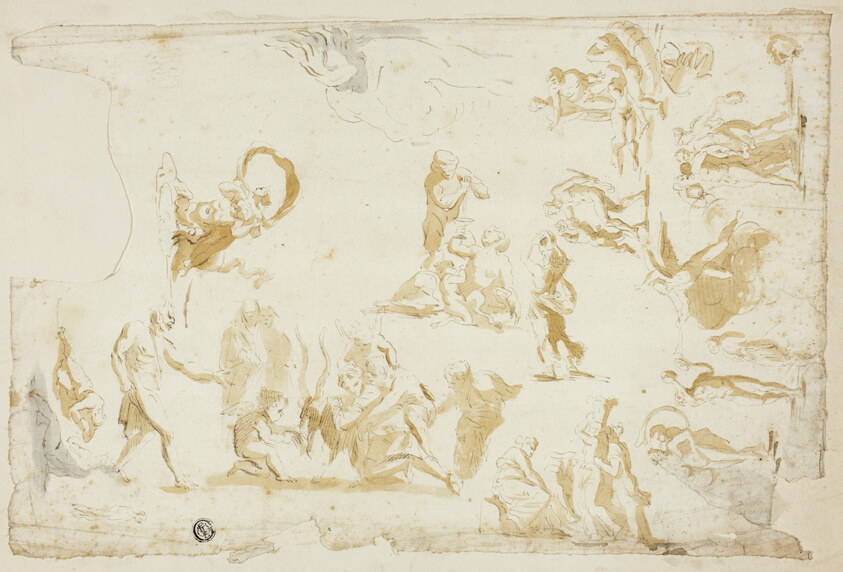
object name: Drawing and Watercolor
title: Sketches of Mythological Subjects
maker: Giovanni Battista Cipriani (Italian, 1727-1785)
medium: Pen and brown ink with brush and brown wash, and touches of gray wash, on ivory laid paper, laid down on buff wove card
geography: Italy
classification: pen and ink drawings; drawings (visual works); prints and drawing